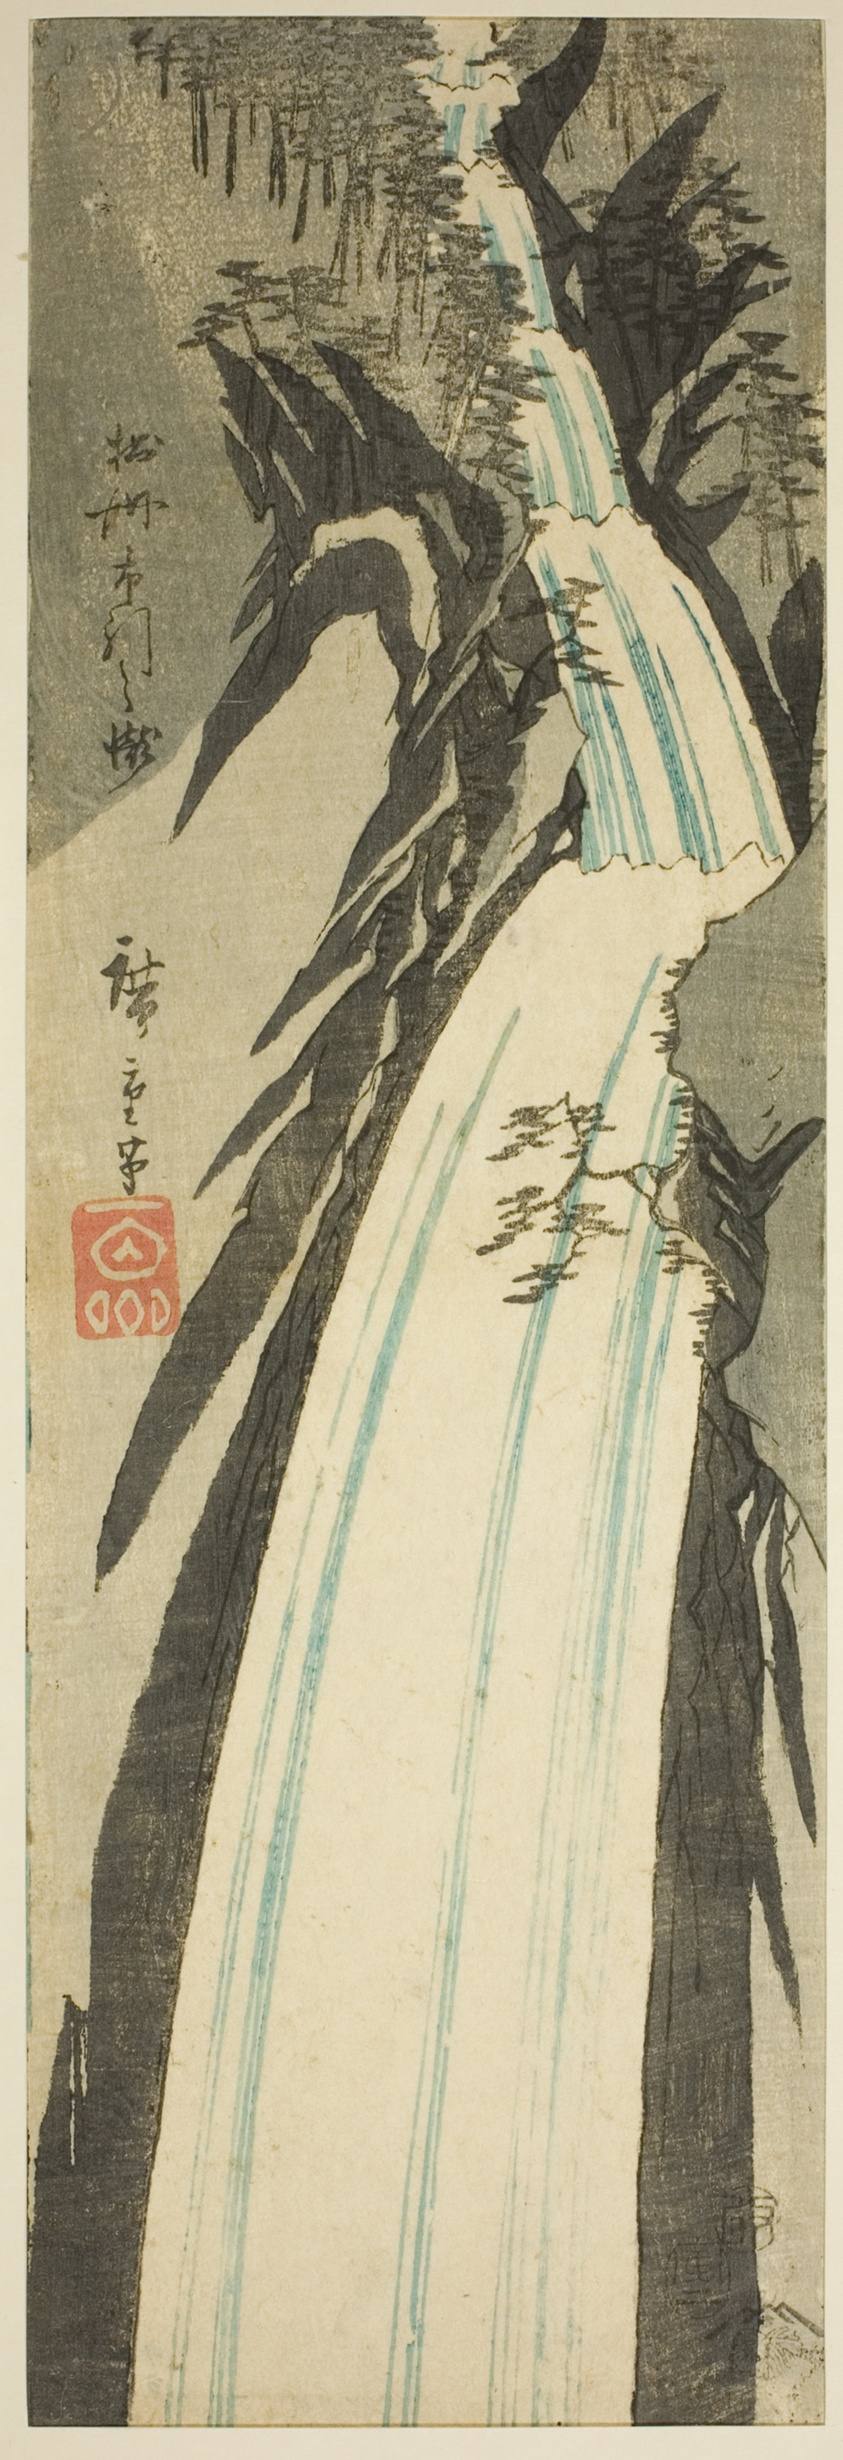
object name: Print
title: Nunobiki Waterfall in Settsu Province (Sesshu Nunobiki no taki), from an untitled series of views of the provinces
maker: Utagawa Hiroshige 歌川 広重; Japanese, 1797-1858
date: 1854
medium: Color woodblock print; aitanzaku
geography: Japan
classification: woodblock print; print; asian art